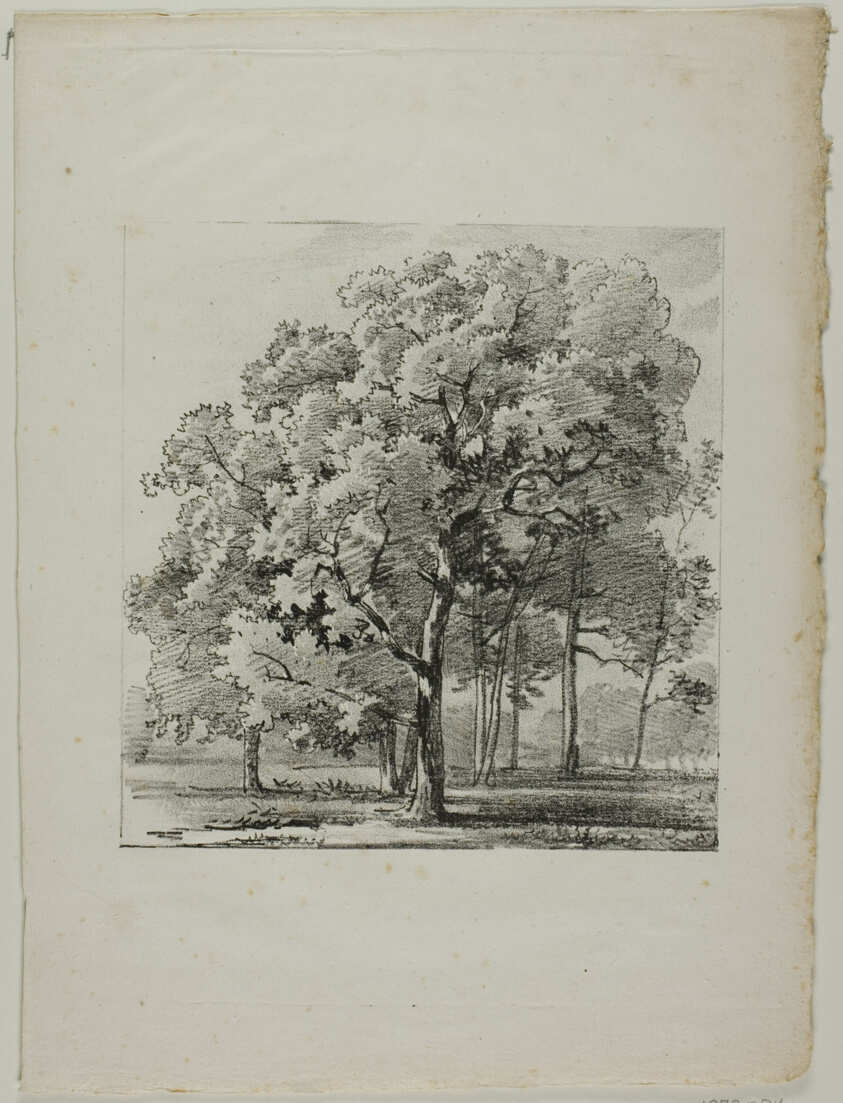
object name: Print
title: Study of Trees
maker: Louis Pierre Baltard (French, 1764-1846)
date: c. 1817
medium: Lithograph in black on ivory laid paper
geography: France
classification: lithograph; print; prints and drawing